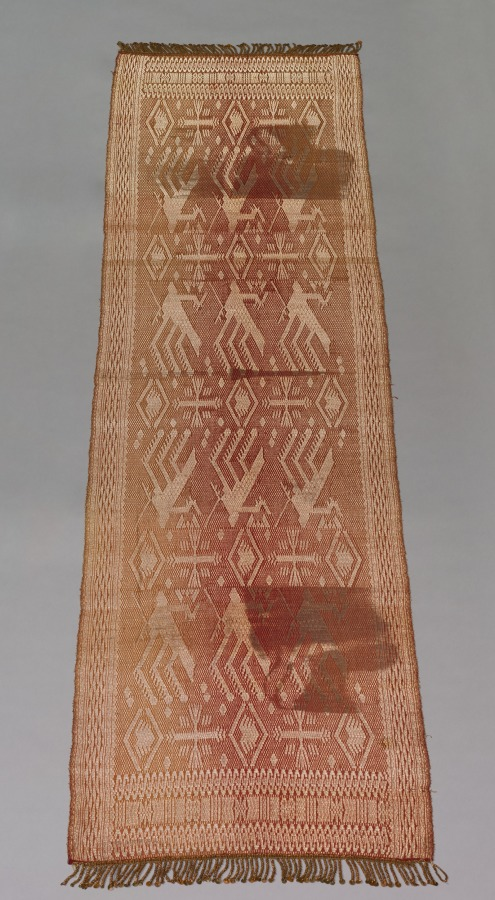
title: Brocade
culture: Indonesia, Sumatra, Minangkabau, late 19th century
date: late 1800s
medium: brocade; silk and metal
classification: Textile